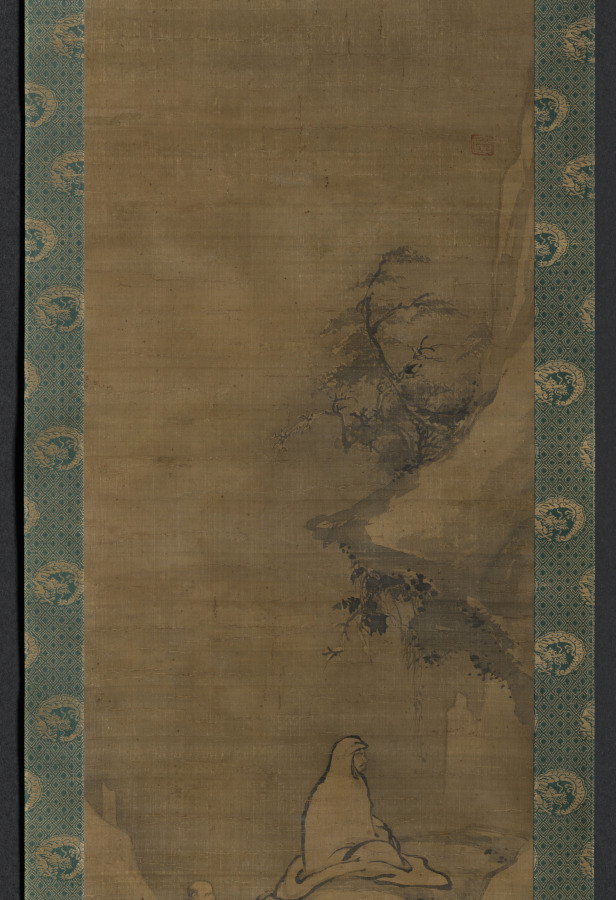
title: Bodhidharma Meditating Facing a Cliff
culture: China, Song dynasty (960-1279)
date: late 1200s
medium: Hanging scroll; ink on silk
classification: Painting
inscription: Spurious artist's seal of Yan Ciping 閻次平 [c. 1163–1189]. WKH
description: Bodhidharma is the legendary founder of Chan (Zen) Buddhism in China. Here he is seen meditating in front of a cliff, atop Mount Song. Behind him is his disciple Huike, the first recipient of his teaching.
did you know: Rough and calligraphic brushwork for landscape and drapery contrasts with more psychologically penetrating representation of the two protagonists' faces.